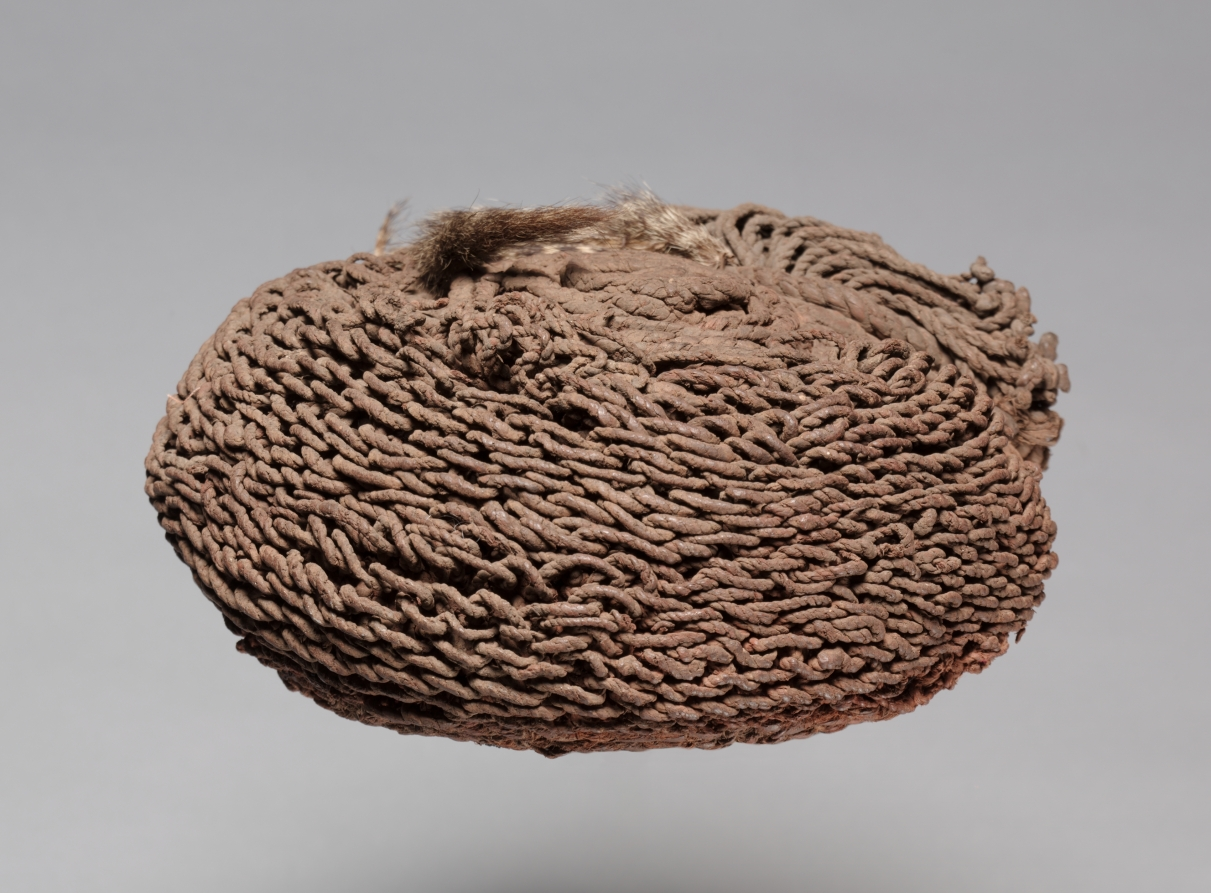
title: Wig (uyembe matota, wiyembe, or pulumba)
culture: Central Africa, Democratic Republic of the Congo or Angola, Chokwe, early to mid 20th century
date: early to mid 1900s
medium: Plant fiber, pelt, and clay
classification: Garment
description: Among the Chokwe, hats, diadems, and wigs of all sorts made in a variety of materials were once commonly worn by both men and women. Some were exclusive to religious and political titles. This wig imitates a female hairstyle in vogue until the 1960s. Made by a male craftsman, it was most typically worn by a woman at dances and other public festivals.